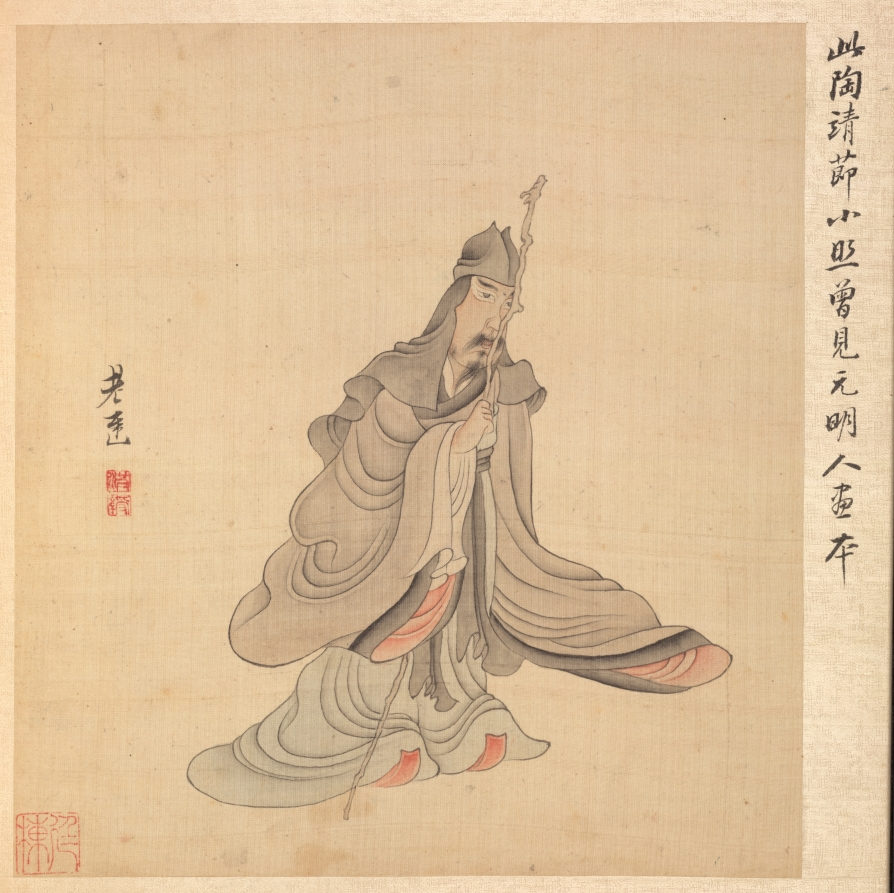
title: Paintings after Ancient Masters: Portrait of Tao Yuanming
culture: China, Ming dynasty (1368–1644)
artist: Chen Hongshou (Chinese, 1598/99–1652)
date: 1598–1652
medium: Album leaf; ink and color on silk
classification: Painting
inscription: 老蓮. [印] 洪綬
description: Poet Tao Yuanming (365–427 CE) turned down a career as an official in politically turbulent times to return to his home estate, northwest of Mount Lu, to write poetry and enjoy his garden and wine. Having an ailing foot, he was carried in a basket or walked with a staff. As he grew chrysanthemums, Tao is associated with this flower. The artist Chen Hongshou, active in Zhejiang province, suffered through the violent transition from the Ming to the Qing dynasty around 1644. By portraying the poet who lived a millennium earlier during similarly fraught times, Chen intentionally chose an archaistic style.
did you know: Chen Hongshou made this double-album with twenty paintings for a friend, Lin Zhongqing.